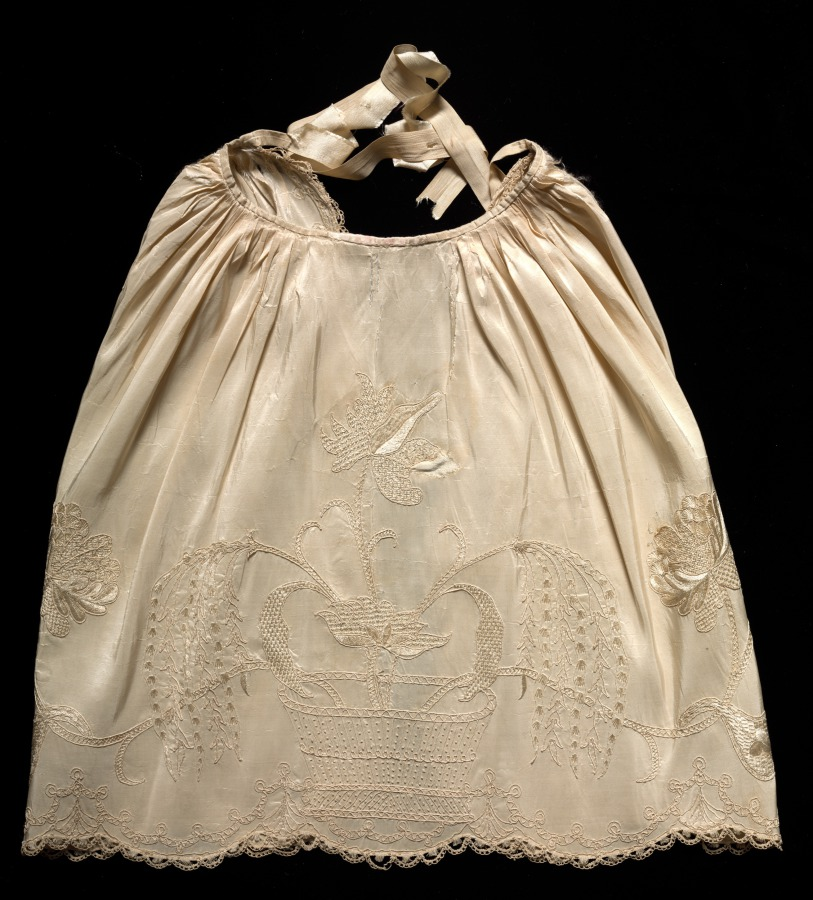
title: Embroidered Taffeta Apron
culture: England, 18th century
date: 1700s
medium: embroidery, silk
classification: Embroidery